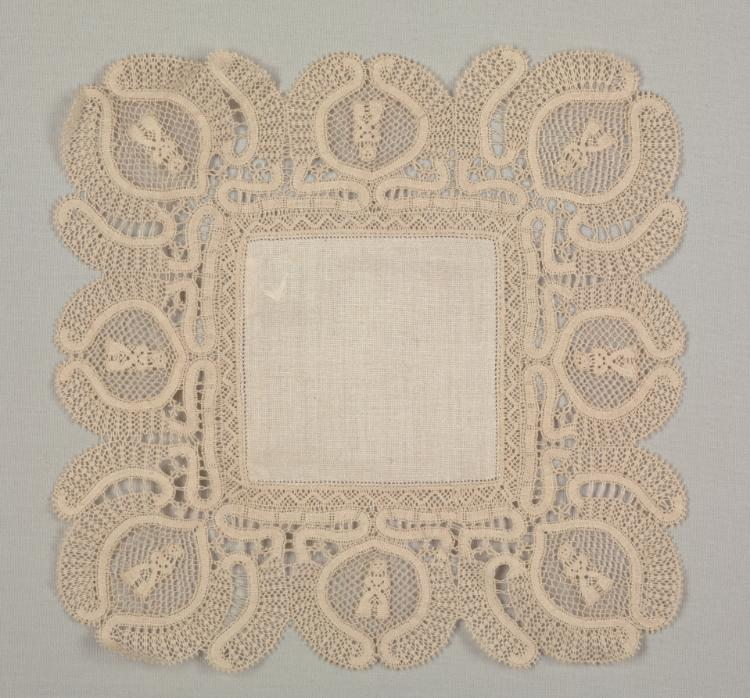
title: Lace Square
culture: Italy, Abruzzi, Pescocostanzo, l'Aquila, 19th century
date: 1800s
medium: bobbin lace with embroidery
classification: Lace